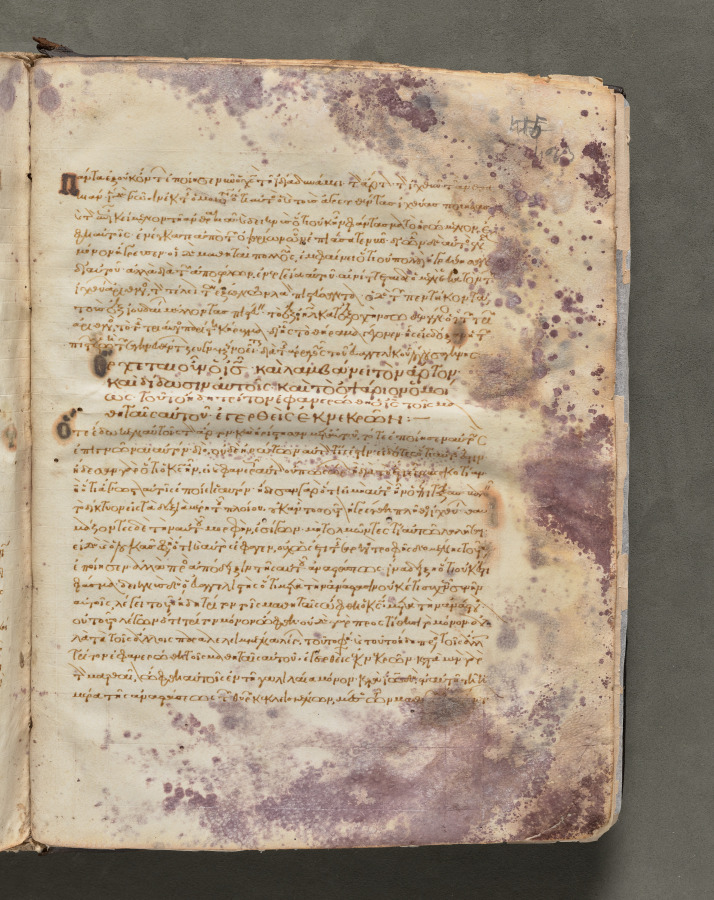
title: Text, folio 423 (recto), from a Gospel Book with Commentaries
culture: Byzantium, Constantinople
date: c. 1000–1100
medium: ink, tempera, and gold on vellum; leather binding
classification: Bound Volume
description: Each of the four gospels in this book opens on a page with brilliantly illuminated borders depicting the author of the text as well as birds—principally peacocks, symbols of the immortality of the soul—and fountains, representing the fountain of life and the salvation of the soul. This volume consists of 428 leaves with texts in Greek. Its level of sophistication suggests that it was probably written and decorated in a monastery in Constantinople.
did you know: Gospel books were carried in procession through Byzantine churches.